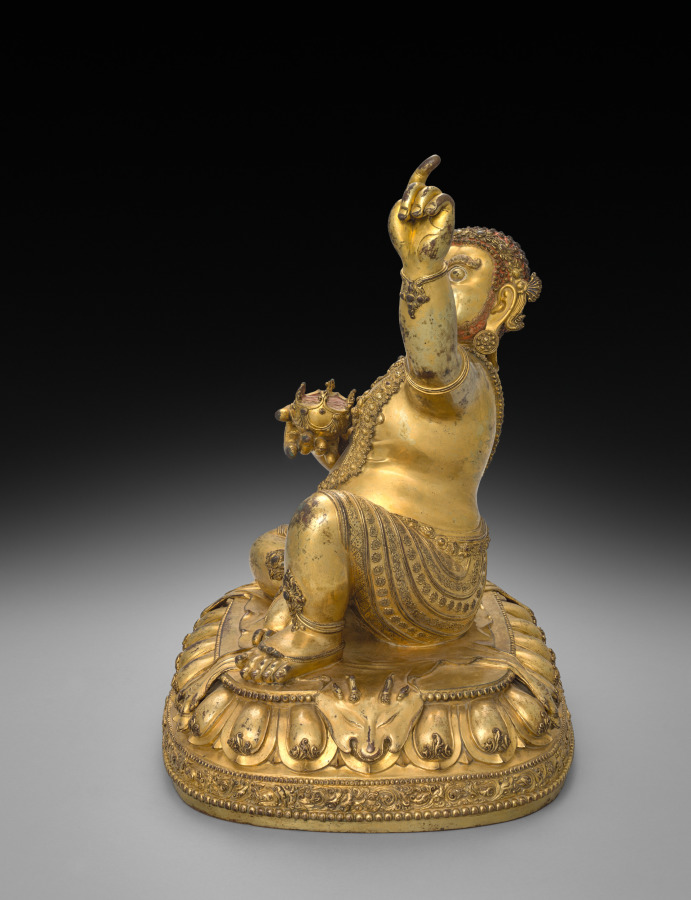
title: Virupa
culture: China, Ming dynasty (1368-1644), Yongle reign (1403-1424)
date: early 1400s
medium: Gilt bronze with silver, stones, and pigment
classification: Sculpture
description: Virupa is one of the great teachers in the history of tantric Buddhism. His posture references his ability to stop the sun; as an enlightened being, he can control phenomena of nature. As a tantric practitioner, he overturns ordinary assumptions about proper behavior, so he overeats, drinks large quantities of liquor, and waits for the king to pay his bill at the tavern. At the edge of the lotus pedestal is an inscription identifying the image as having been made in the imperial kilns of the third emperor of the Ming dynasty in China as a gift to a Tibetan monastic leader. While closely linked to Tibetan styles, the luxurious detailing, special gilding process, and the casting of the ornaments onto the body without use of inlay are specifically Chinese characteristics.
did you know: Virupa's clothing and jewelry are embellished with silver and stones, while pigments enhance his hair and eyes.